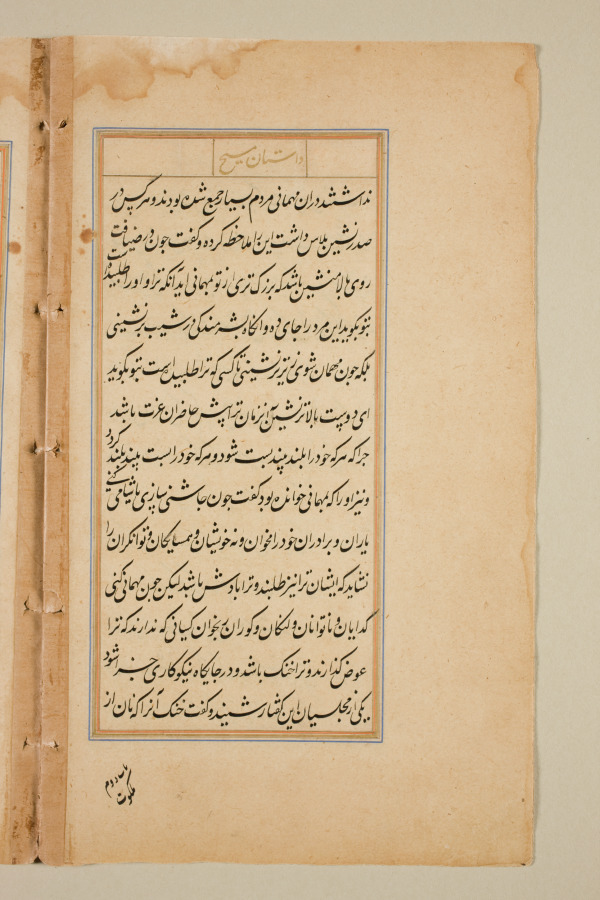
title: Text page from a Mirror of Holiness (Mir’at al-quds) of Father Jerome Xavier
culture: Mughal India, Allahabad, made for Prince Salim (1569–1627)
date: 1602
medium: Ink and gold on paper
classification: Manuscript